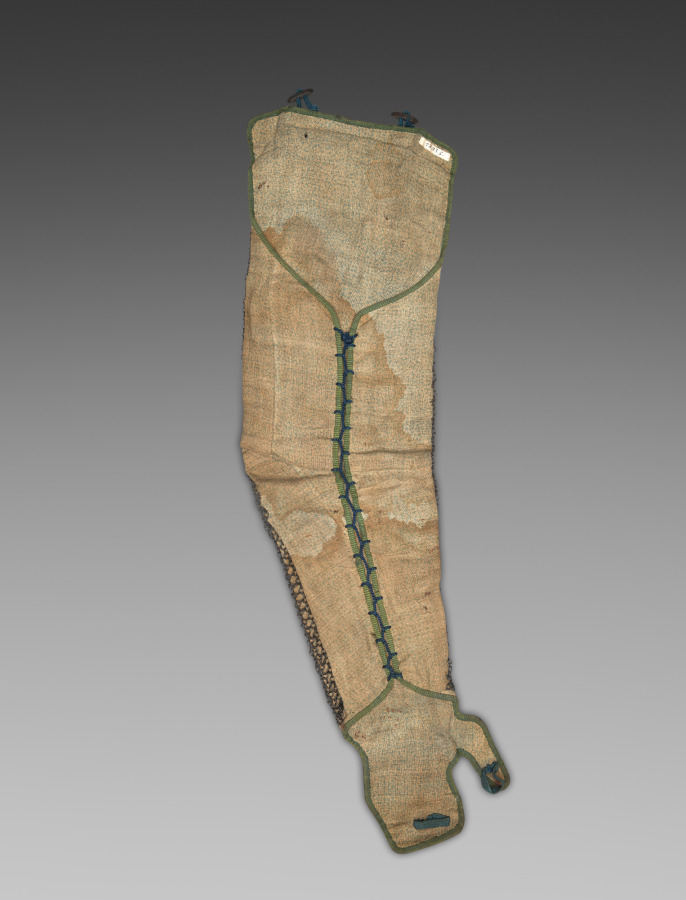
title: Armored Sleeve (Kote)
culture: Japan, Edo period (1615–1868)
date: 1615–1868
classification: Arms and Armor